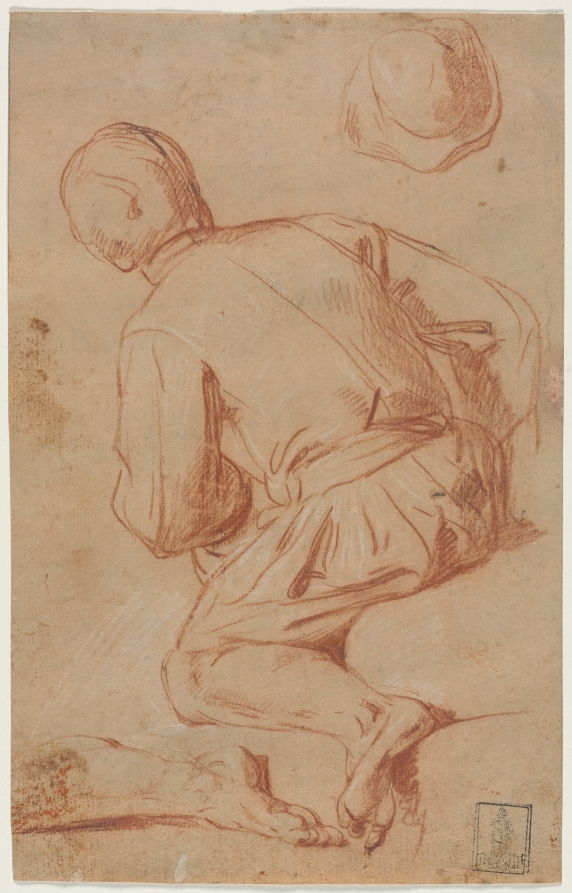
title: Rear View of Seated Man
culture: Italy, 17th century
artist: Carlo Vimercati (Italian, 1660–1715)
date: late 1600s?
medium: red chalk heightened with white chalk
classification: Drawing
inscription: VERSO, upper right, in graphite: CARRACCI / Soc. G - 631 / OA ; upper center, in graphite: Pontormo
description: By the late 1600s, painters of religious subjects, such as Carlo Vimercati, sought to make the content of their church decorations more accessible to a general congregation through the use of dramatic gestures and observed naturalistic details. Such artists often relied on figure studies like this drawing of a posed studio assistant to capture the dress and physique of everyday people and thus imbue their paintings with realistic elements.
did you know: Red chalk was a common medium used by artists of the 1600s to make drawings from live models.